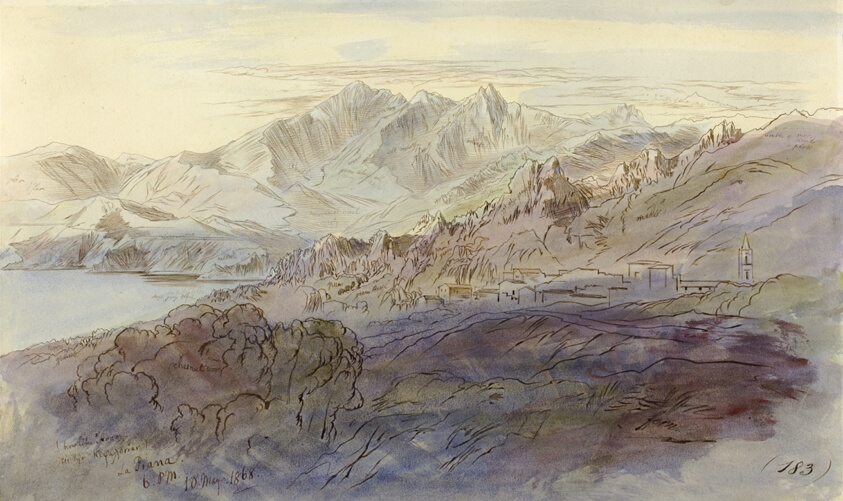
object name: Drawing and Watercolor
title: La Piana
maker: Edward Lear (English, 1812-1888)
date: 1868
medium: Watercolor and pen and brush and brown ink, over graphite, on ivory wove paper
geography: England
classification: watercolor; drawings (visual works); prints and drawing